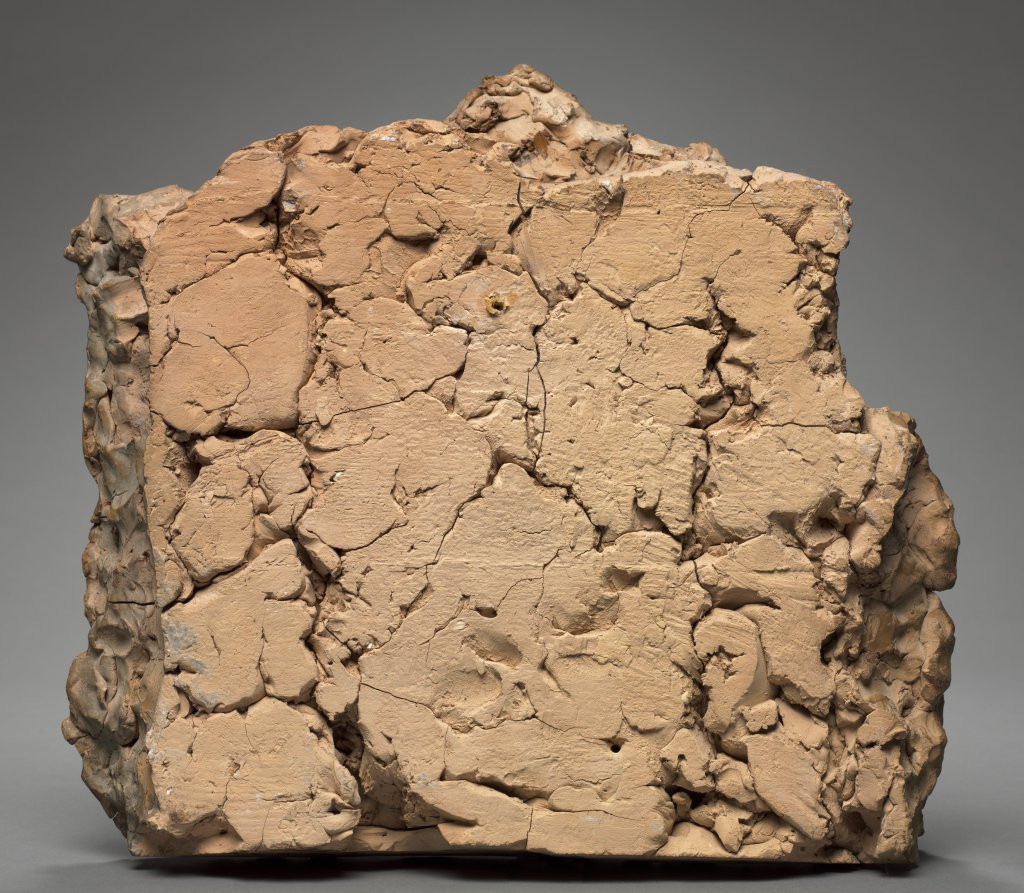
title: Two Angels and Cherubs Bearing an Icon of Christ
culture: Italy, Rome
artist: probably by Paolo Naldini (Italian, 1616–1691)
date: c. 1670–80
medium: terracotta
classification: Sculpture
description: This work is probably a study for a large altarpiece that would have combined several materials, including marble, stucco, and paint. The artist modeled his design in soft clay, which was then hardened by firing; subtle tints suggest the richness of the finished work. The idea of using sculptural figures to support a painted image within an altarpiece was influenced by the work of the Roman sculptor Gian Lorenzo Bernini (1598–1680), with whom Naldini is known to have worked.